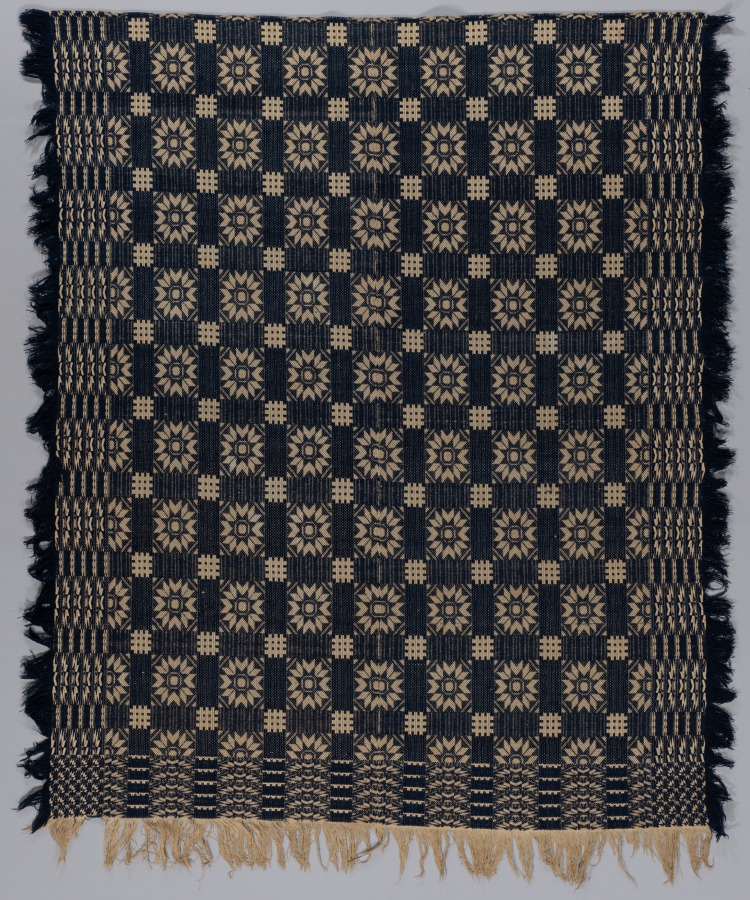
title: Coverlet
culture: America, Connecticut ?, 19th century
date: 19th century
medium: cotton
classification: Textile